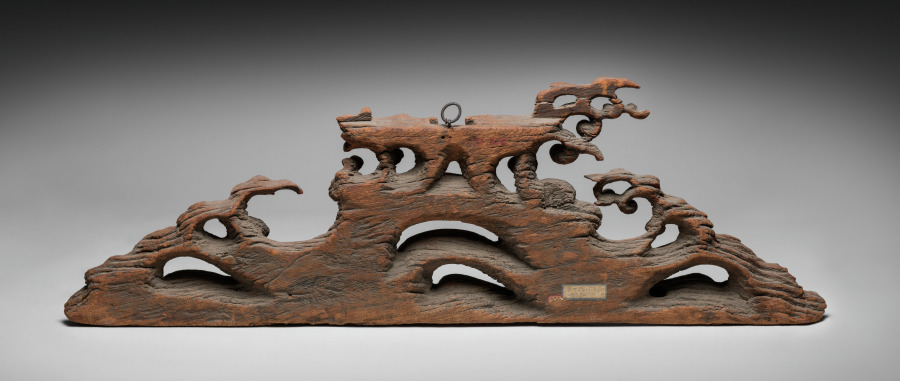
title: Wave (ramma)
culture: Japan, Momoyama period (1573–1615)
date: c. 1600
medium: wood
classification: Sculpture